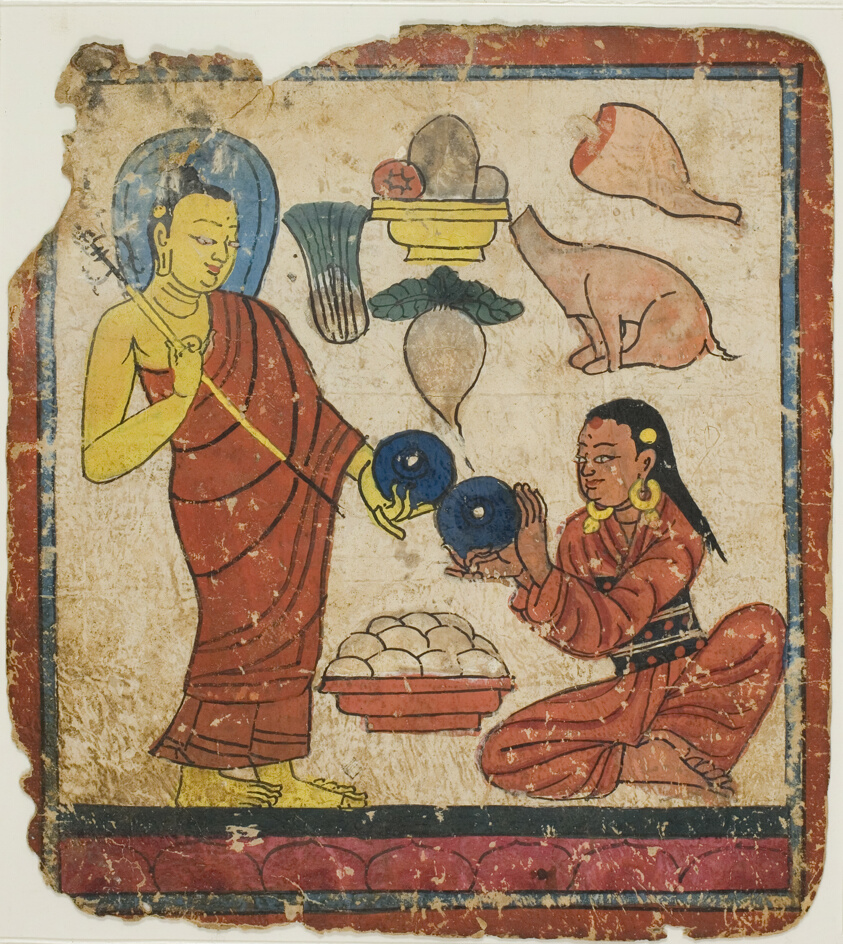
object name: Painting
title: Lady Offering Food to a Monk, From a Set of Initiation Cards (Tsakali)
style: Himalayan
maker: Southern Tibet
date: 14th/15th century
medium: Ink and watercolor on paper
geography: Tibet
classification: miniature painting; painting; asian art